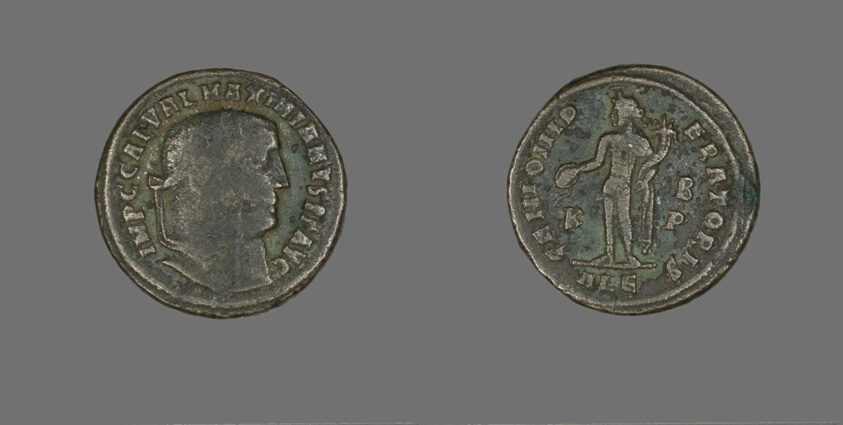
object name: Coin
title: Coin Portraying Emperor Galerius Maximianus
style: imperial (roman), ancient, roman (ancient, style or period)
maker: Roman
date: 305-311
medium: Bronze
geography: Roman Empire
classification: coin; ancient art